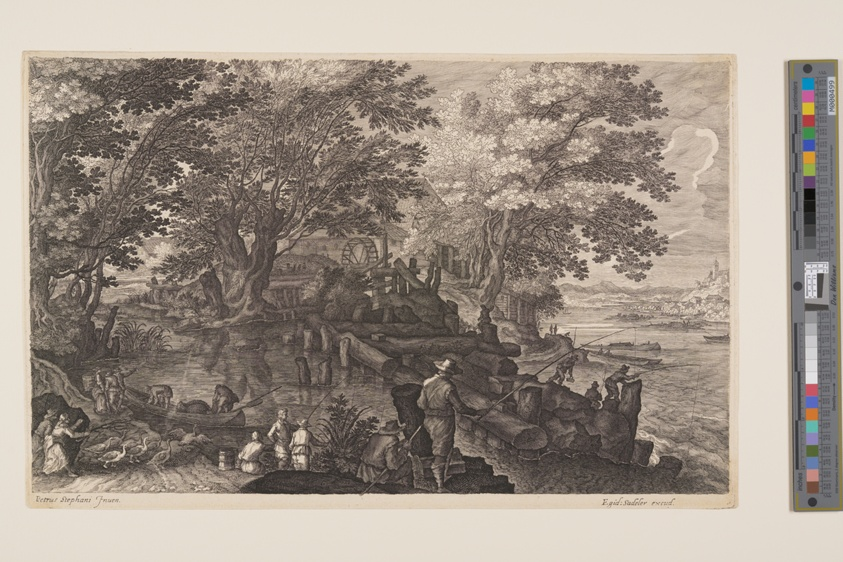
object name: Print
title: Scene One: Watermill on an Island in a River with Men Fishing, from Eight Scenes from Bohemia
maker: Aegidius Sadeler II (Flemish, c. 1570–1629); after Pieter Stevens (Flemish, 1567-after 1624)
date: 1610/20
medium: Engraving on ivory laid paper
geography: Flanders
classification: print; paper; prints and drawing; engraving